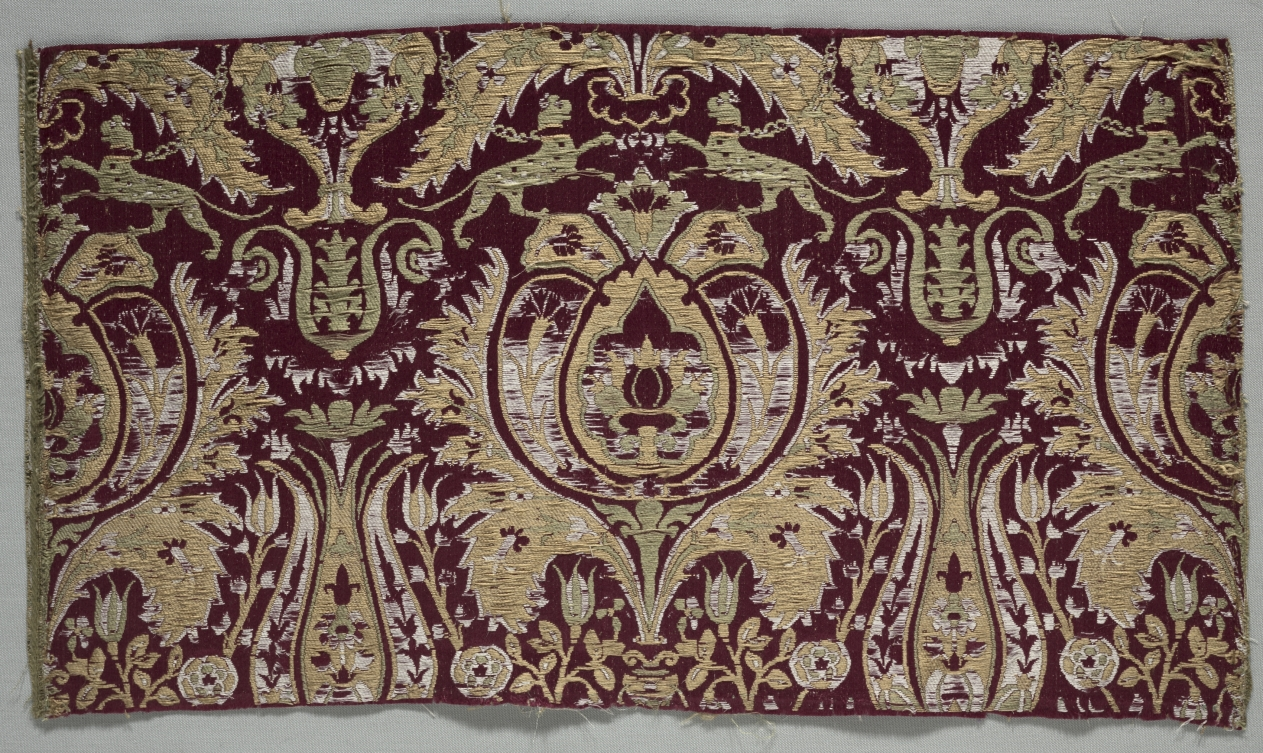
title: Textile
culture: Italy, 16th century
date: 1500s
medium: brocade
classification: Textile